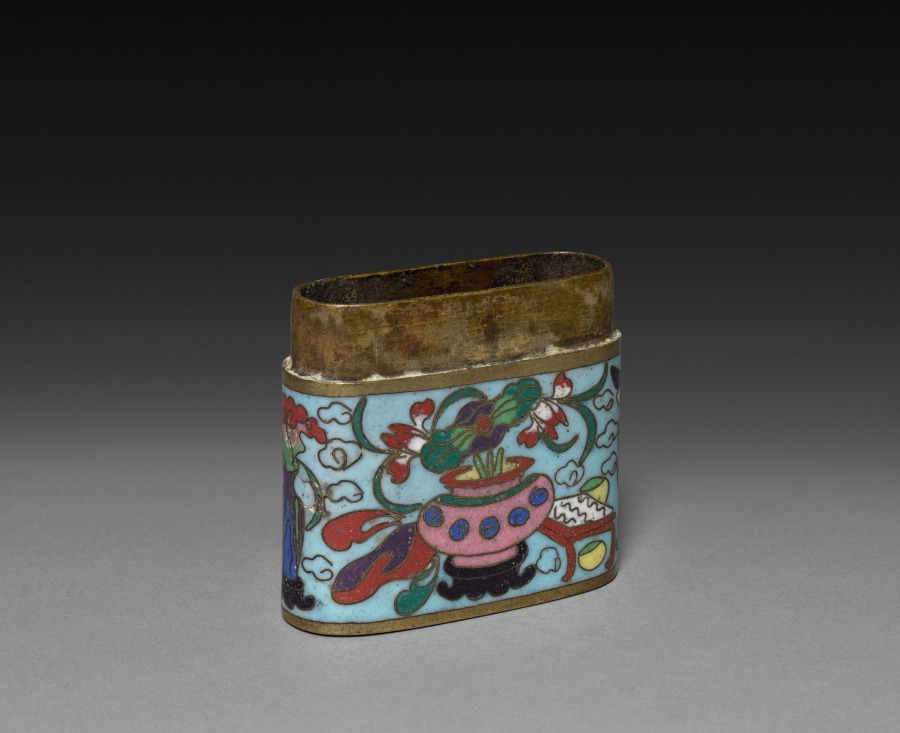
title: Box with Scholar's Accoutrements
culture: Japan, Meiji period (1868–1912)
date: late 1800s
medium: cloisonne enamel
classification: Enamel